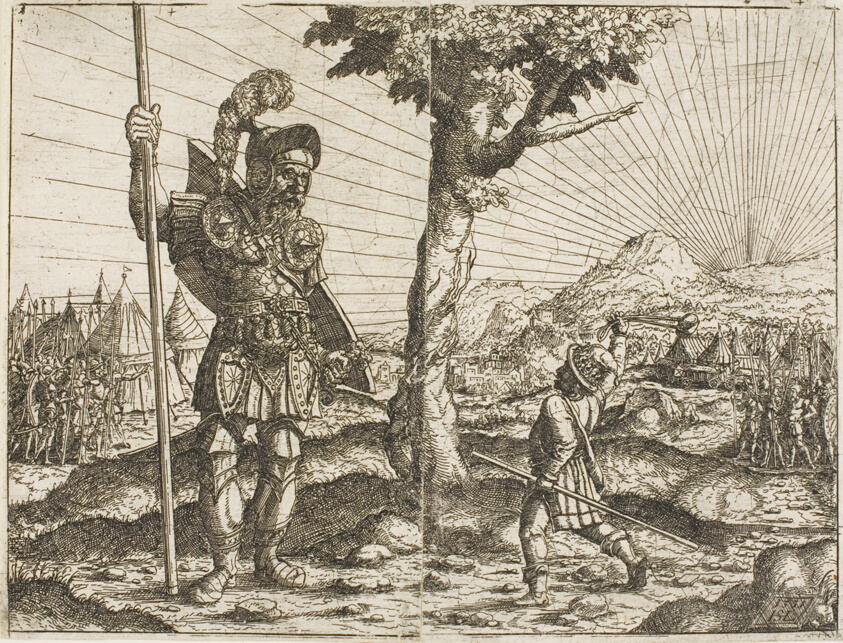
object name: Print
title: David and Goliath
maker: Hanns Lautensack (German, 1524-1560/66)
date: 1551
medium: Etching on paper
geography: Germany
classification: etching; print; prints and drawing